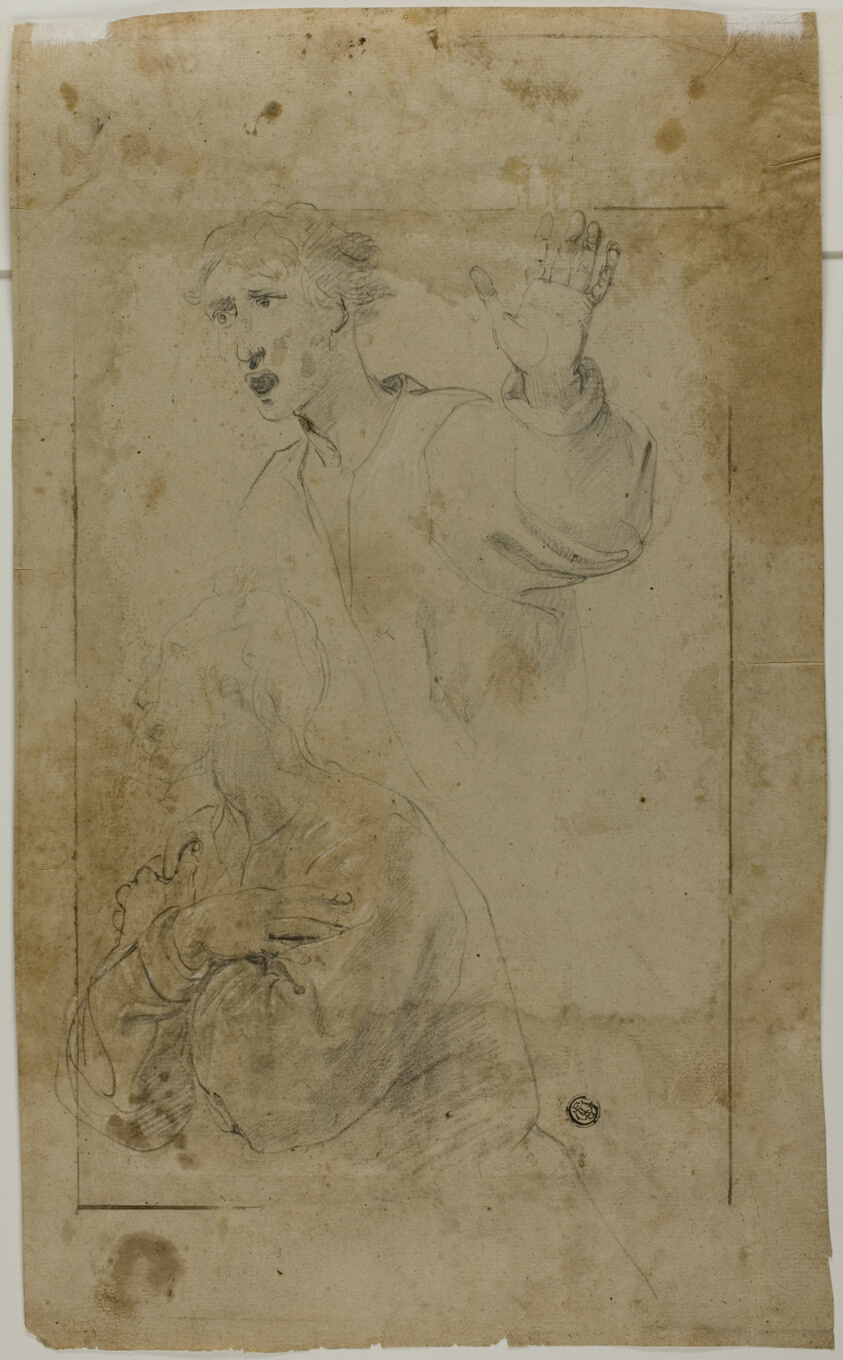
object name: Drawing and Watercolor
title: Standing Male Nude (recto); Two Half Length Male Figures, One with Raised Arm, the Other Praying (verso)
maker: Probably Domenico Fiasella (Italian, 1589-1669); or possibly Lodovico Carracci (Italian, 1555-1619)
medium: Black chalk, with traces of white chalk (recto and verso), on tan laid paper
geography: Italy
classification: drawings (visual works); prints and drawing